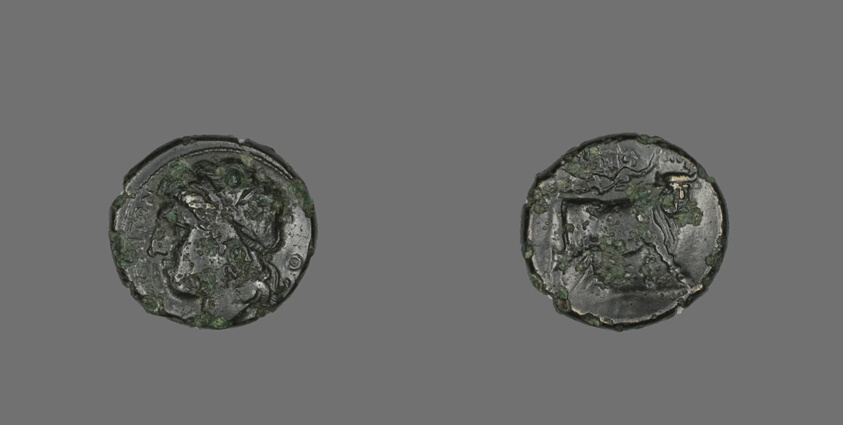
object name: Coin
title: Coin Depicting the God Apollo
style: greek, ancient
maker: Greek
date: about 340-241 BCE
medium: Bronze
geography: Naples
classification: coin; ancient art; struck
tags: mythological figures